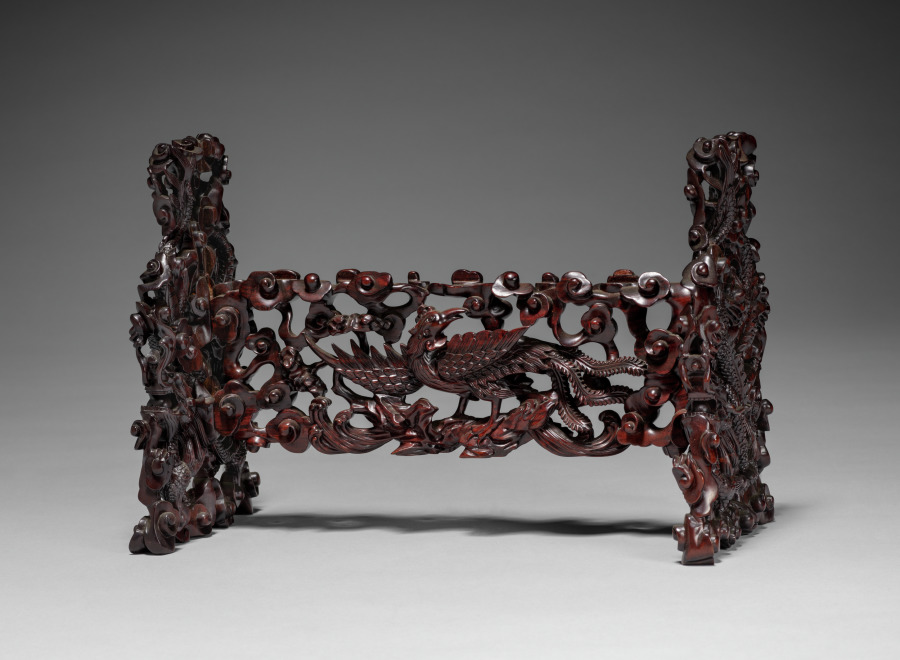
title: Table Screen with Stand (stand)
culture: China, Qing dynasty (1644-1911)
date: 1644–1911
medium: carved wood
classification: Wood